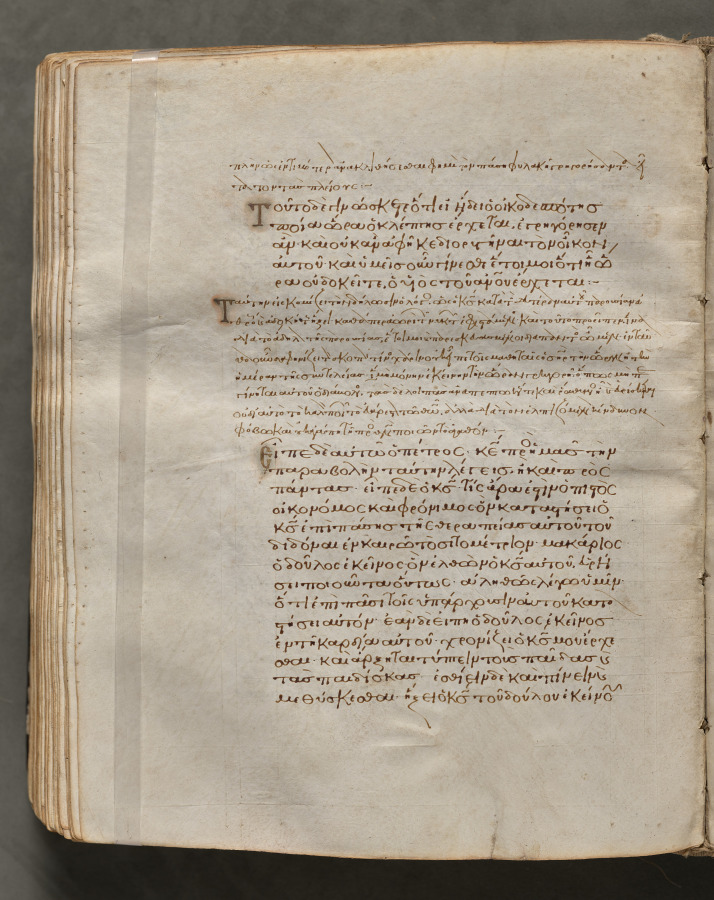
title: Text, folio 269 (verso), from a Gospel Book with Commentaries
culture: Byzantium, Constantinople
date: c. 1000–1100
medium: ink, tempera, and gold on vellum; leather binding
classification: Bound Volume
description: Each of the four gospels in this book opens on a page with brilliantly illuminated borders depicting the author of the text as well as birds—principally peacocks, symbols of the immortality of the soul—and fountains, representing the fountain of life and the salvation of the soul. This volume consists of 428 leaves with texts in Greek. Its level of sophistication suggests that it was probably written and decorated in a monastery in Constantinople.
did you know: Gospel books were carried in procession through Byzantine churches.